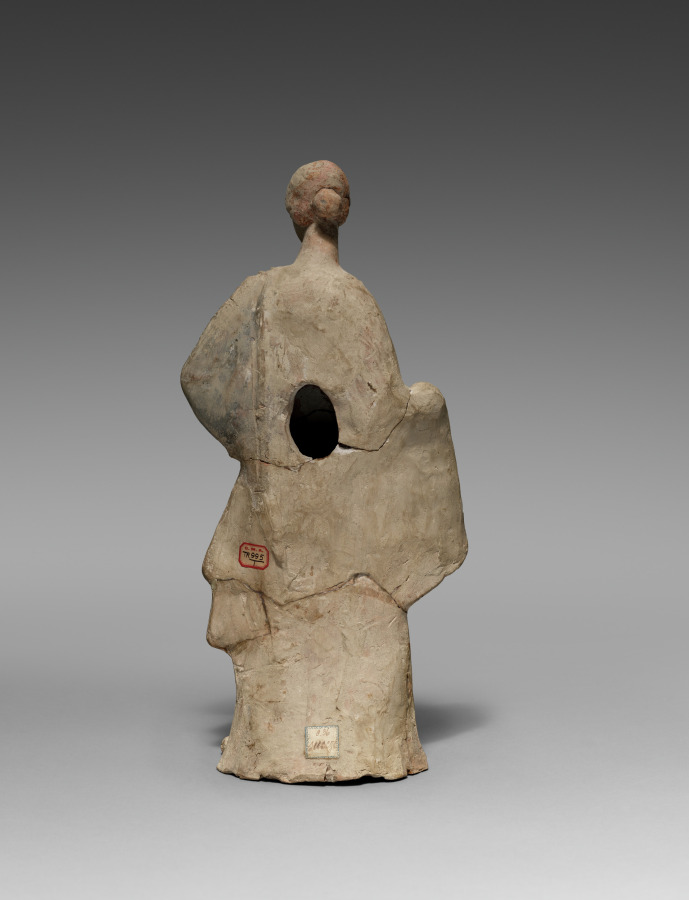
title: Figurine of Standing Woman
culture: Greece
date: 200s BCE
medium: terracotta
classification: Sculpture